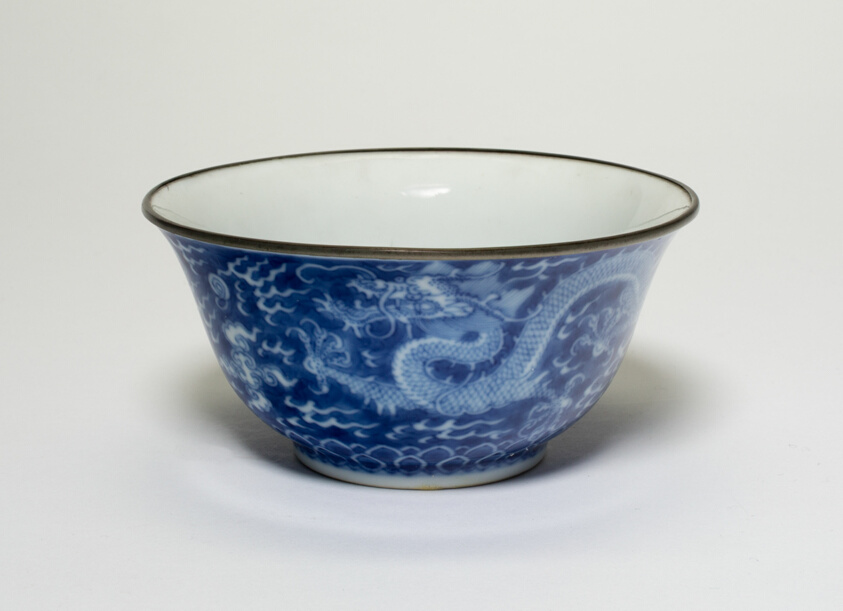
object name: Vessel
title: Bowl with Dragons Chasing Flaming Pearls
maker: China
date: Qing dynasty (1644–1911), Qianlong reign mark and period (1736–1795)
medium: Porcelain painted in underglaze blue with metal rim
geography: China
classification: porcelain; asian art; ceramics